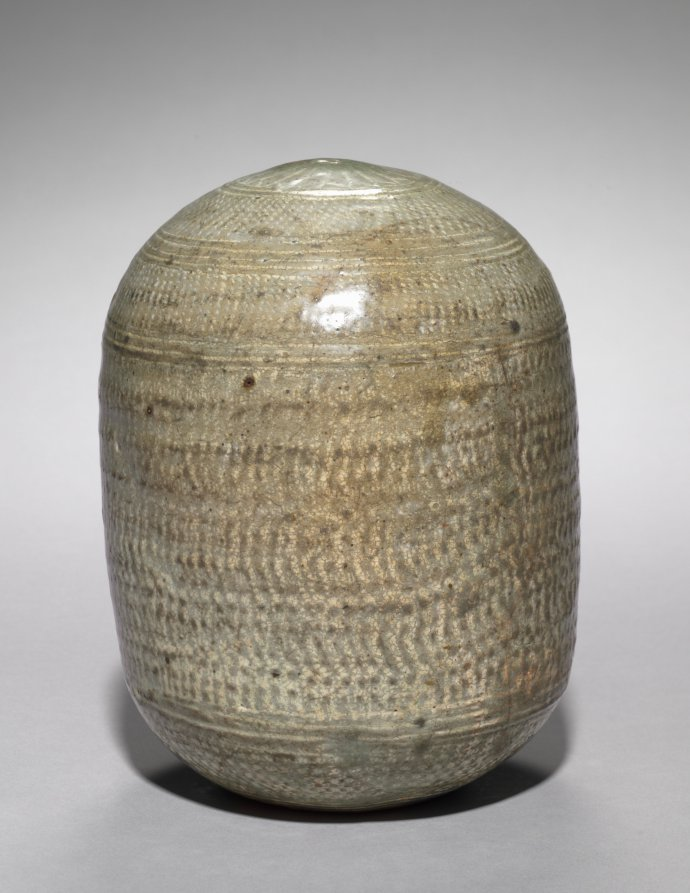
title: Wine Cask with Stamped Floral Decoration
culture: Korea, Joseon dynasty (1392–1910)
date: 1400s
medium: pottery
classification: Ceramic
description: A cask-shaped vessel, such as this work, is believed to have stored different kinds of liquids, including wine, sesame oil, and even water. Having its small mouth in the middle made it useful for not only storing a beverage but also carrying it to a ritual or ceremonial site. To make this work, the artist first applied white slip, then used inlaid and stamped techniques as decorative patterns. Such repetitive and tactile expressions inspired many Korean modern and contemporary ceramic artists in response to the global trend of Abstract Expressionism.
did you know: In order to transfer liquid safely without spilling, the mouth of this vessel is small and placed in the middle.